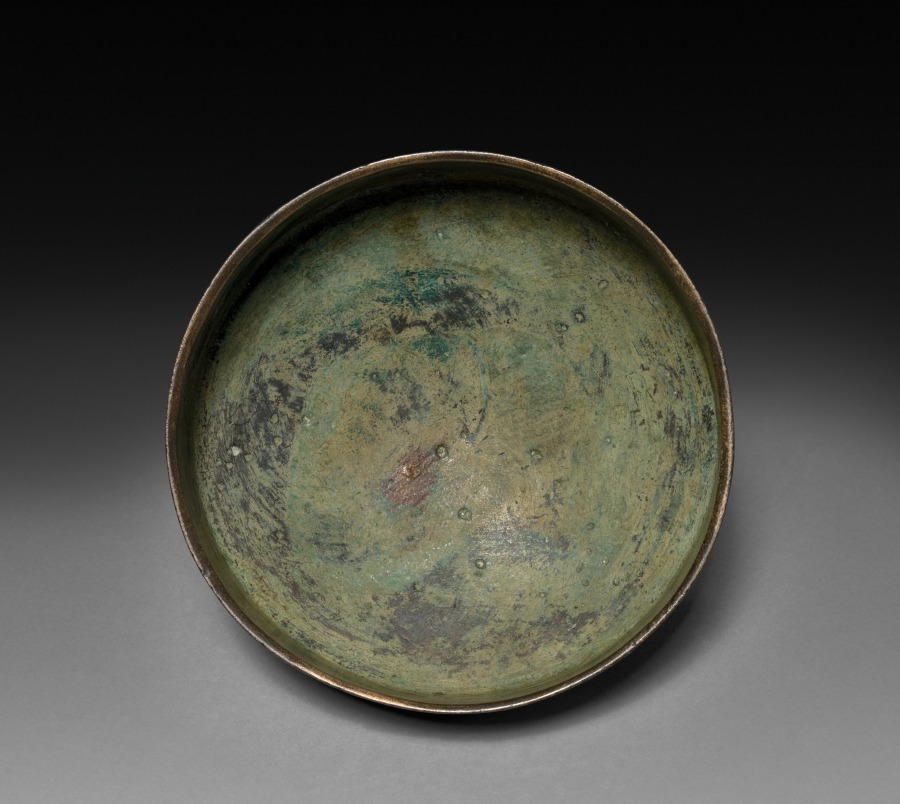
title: Kettle with Handle (lid)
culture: China, Qing dynasty (1644-1911) or Republican period (1912-49)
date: 1700s-1800s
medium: bronze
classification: Metalwork